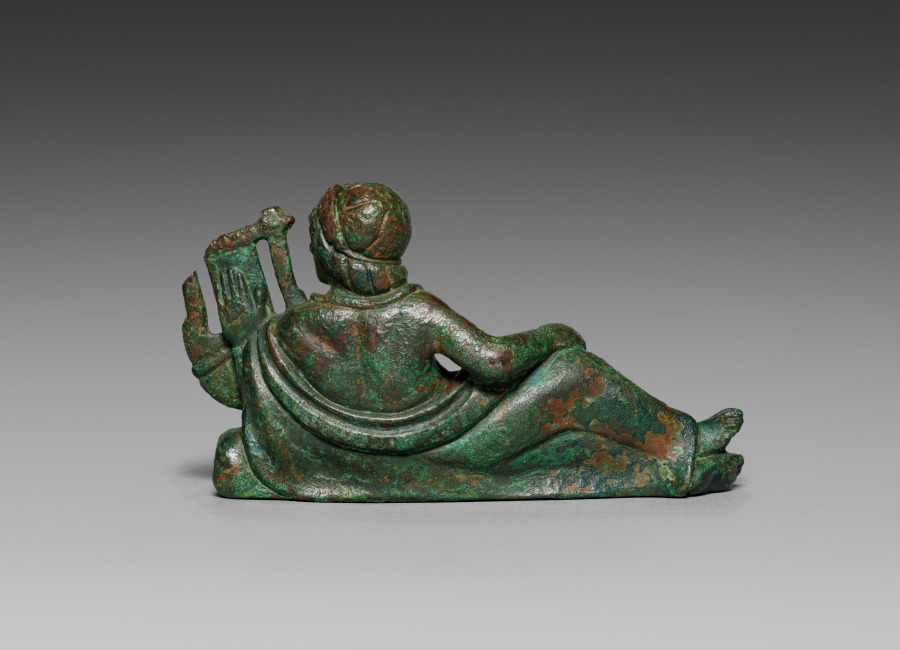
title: Vessel Ornament of Reclining Lyre-player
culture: Etruscan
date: probably 400–375 BCE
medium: bronze with gilding traces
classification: Sculpture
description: This bronze banqueter figurine was one of six once adorning the rim of a large basin, now lost. Cast in molds with individualized details, most have grooves on their underside to attach to the basin. Minute traces of gilding remain on areas of clothing and skin (mostly visible only under magnification), suggesting that they may have been completely gilded. Two handles in the form of hippocampi, horses with serpentine tails, also belonged to the basin and are now displayed at the Michael C. Carlos Museum at Emory University. The basin may have been used to hold liquid for a banquet, or was perhaps funerary. This reclining banqueter holds a lyre in his left hand and an oblong pick in his right hand. His face tilts toward the lyre and garlands hang around his head and chest. Two bare feet emerge from the bottom of the himation in a position distinct from the feet of the other figurines in this group. Some gilding remains on the top edges of the lyre and on the banqueter’s lips and drapery.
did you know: The lyre held by this banqueter bears traces of gilding.